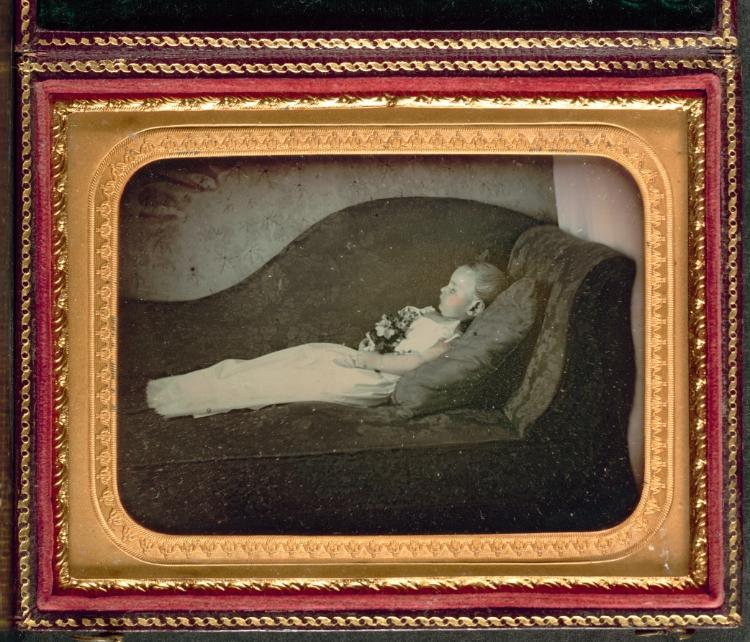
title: Dead Child On a Sofa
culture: America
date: c. 1855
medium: daguerreotype, applied color, quarter-plate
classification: Photograph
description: This carefully staged daguerreotype of a dead child is an outstanding example of a very common subject: the postmortem portrait. Using the stylistic conventions of the day, the unidentified artist successfully created a visually pleasing scene, despite the nature of the image. Dressed in white with a bouquet of flowers on the chest, the child, seen in profile, reclines on an elaborately patterned sofa. Delicate flesh tones were added to the cheek and arm, suggestive of a healthy child sleeping. The high rate of infant mortality throughout the 19th century made this variety of portraiture common, satisfying the emotional need of the parents to have a lasting memory of a loved one.